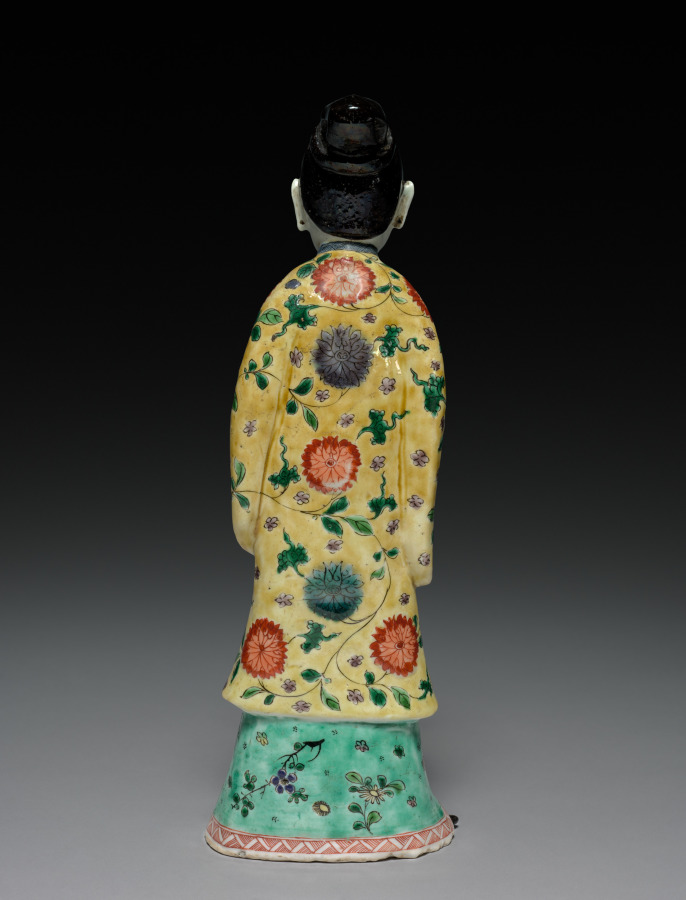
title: Court Lady Holding a Sheng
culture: China, Jiangxi province, Jingdezhen kilns, Qing dynasty (1644-1911), Kangxi reign (1662-1722)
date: 1662–1722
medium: porcelain with famille verte overglaze enamel decoration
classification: Ceramic